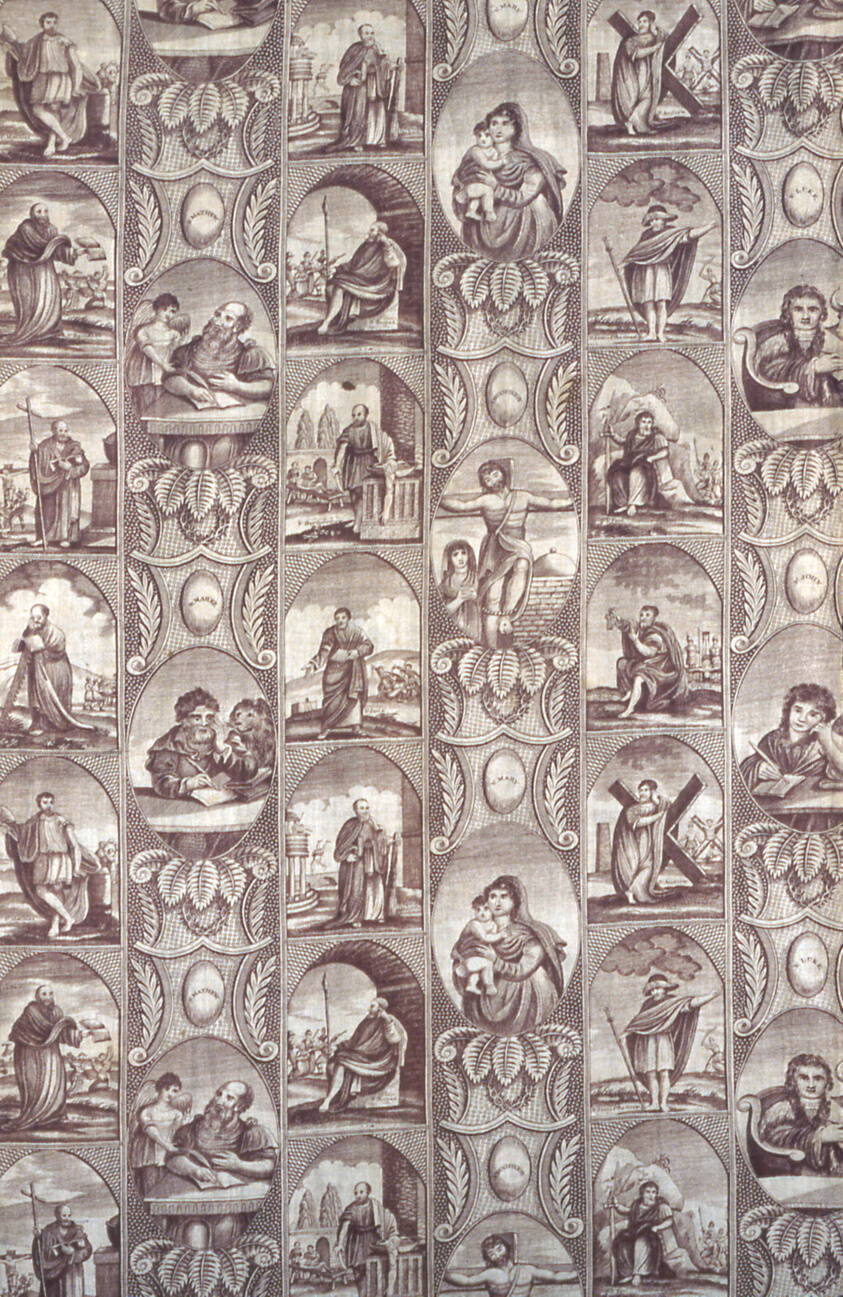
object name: Textile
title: Panel (Furnishing Fabric)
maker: England or Ireland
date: 1825–1875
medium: Cotton, plain weave; engraved roller printed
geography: England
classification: textile; weaving - printed; furnishing textile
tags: propaganda